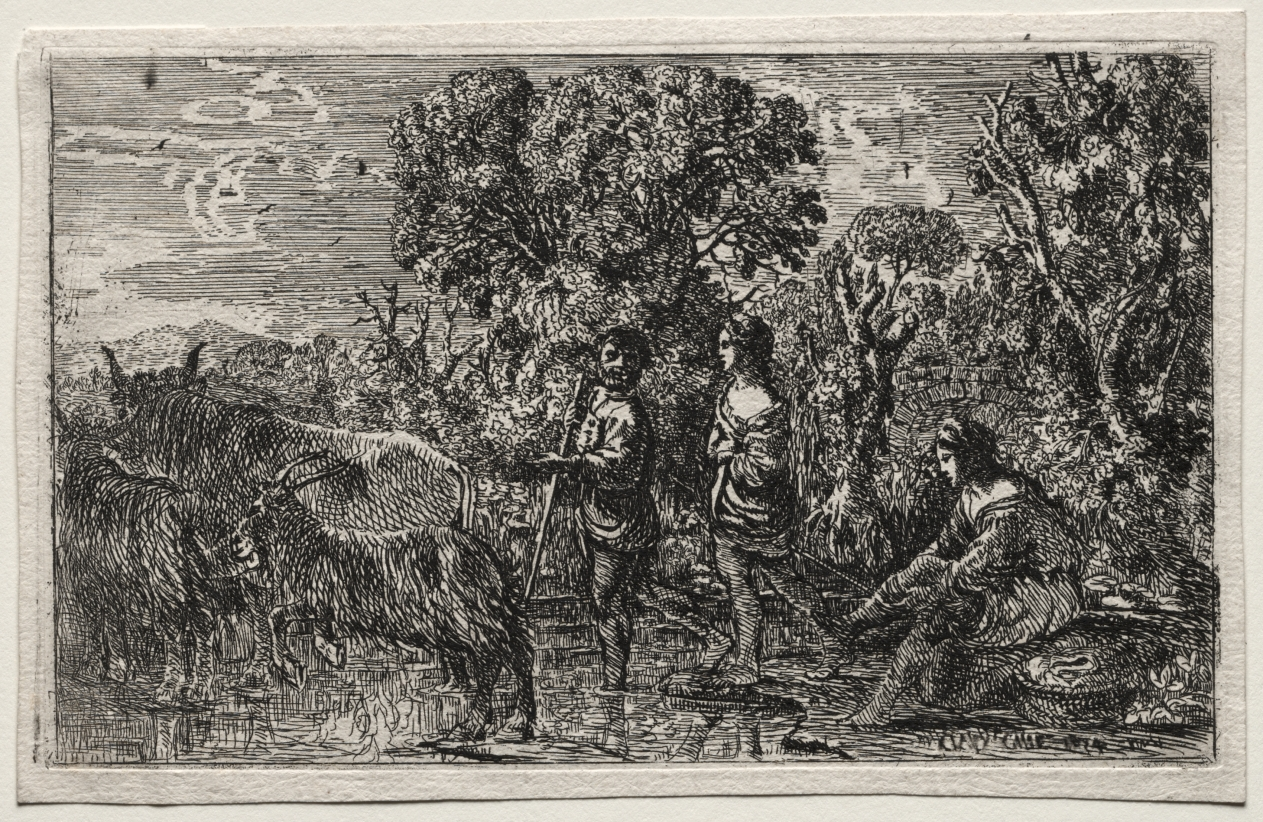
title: Le Passage du gué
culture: France, 17th century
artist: Claude Lorrain (French, 1604–1682)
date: 1634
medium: etching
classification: Print